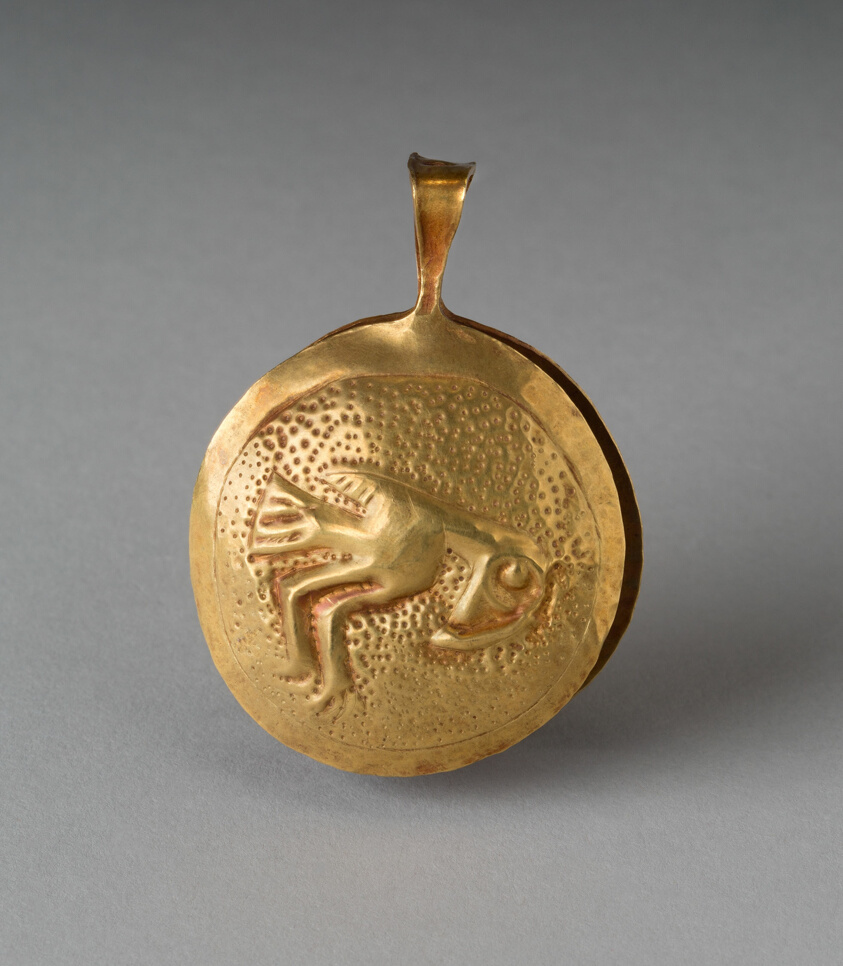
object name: Decorative Arts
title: Circular Tweezers with Bird in Relief Against a Stippled Background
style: chimú, Arts of the Americas, andean, andes, peruvian, south american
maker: Probably Chimú; North coast, Peru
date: Probably 1000–1400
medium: Gold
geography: Peru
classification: metal; american decorative arts; utensil; decorative arts; art of the americas